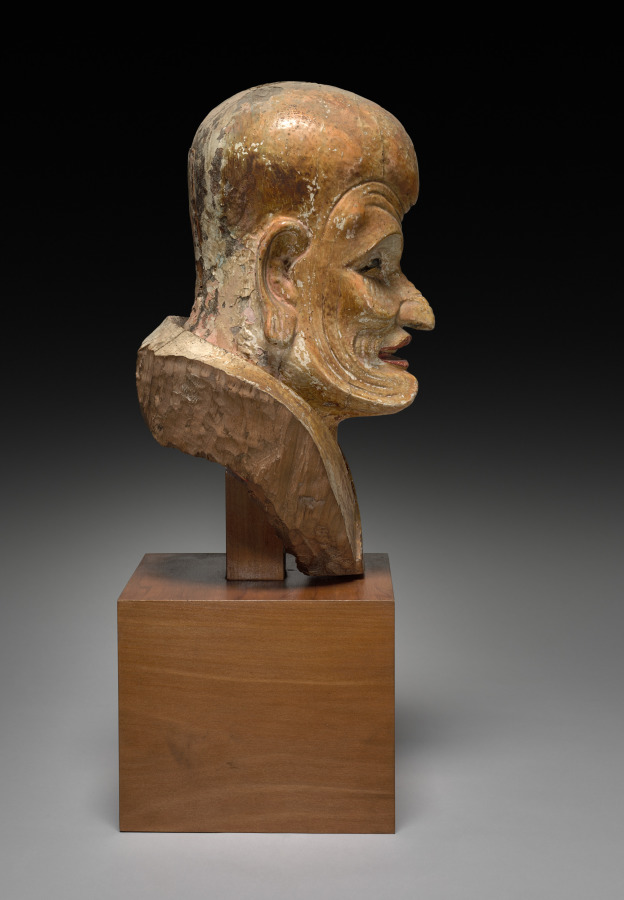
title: Head of a Patriarch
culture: China, Ming dynasty (1368-1644) or earlier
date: 1368–1644 or earlier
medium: wood covered with lacquer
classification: Sculpture